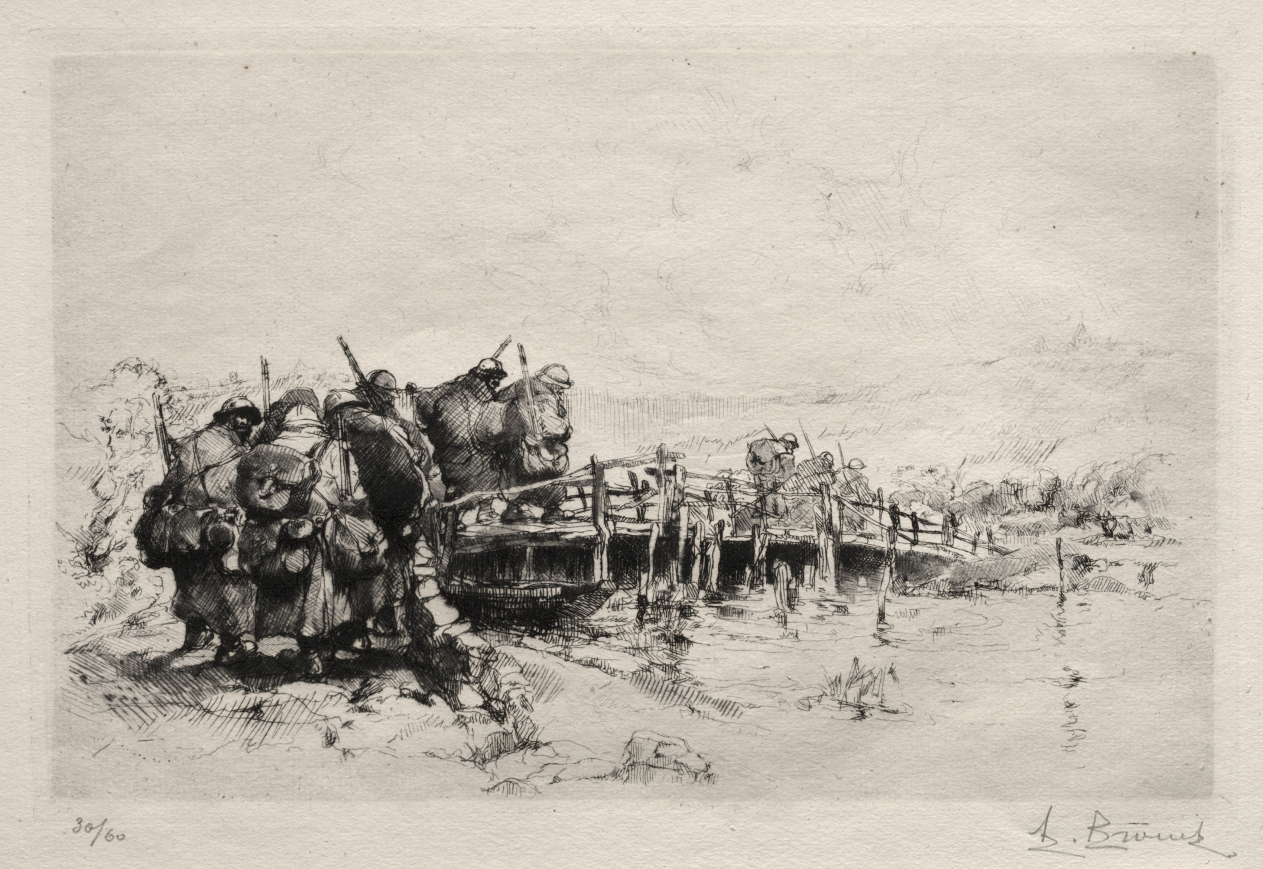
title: The Footbridge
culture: France, 20th century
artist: Auguste Brouet (French, 1872–1941)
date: before 1925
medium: etching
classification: Print